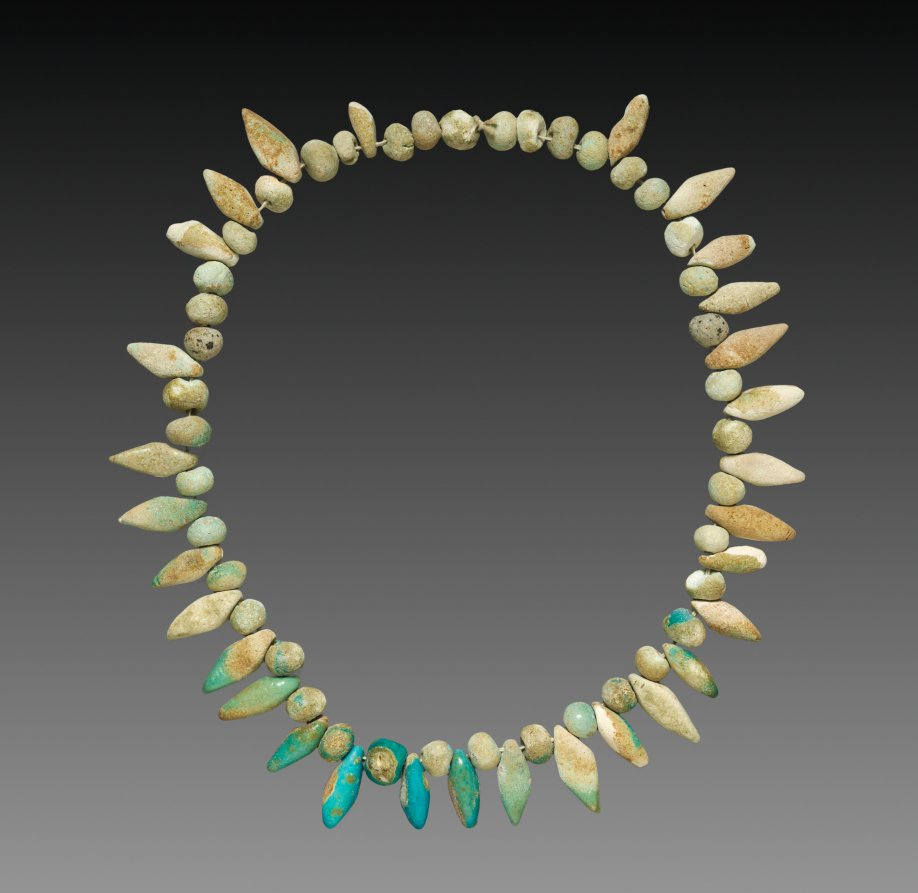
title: Necklace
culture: Egypt, Middle Kingdom (2040–1648 BCE)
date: 2040–1648 BCE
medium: faience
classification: Jewelry